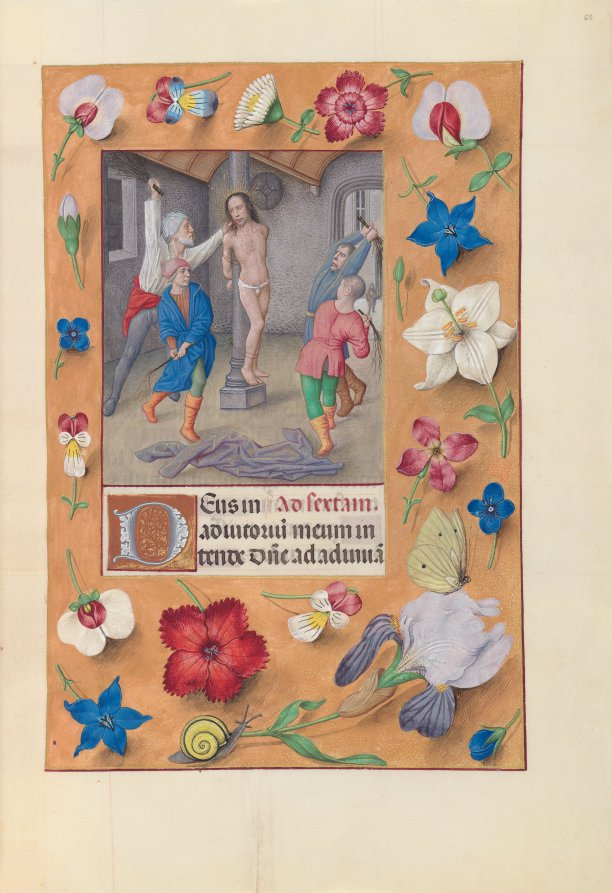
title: Hours of Queen Isabella the Catholic, Queen of Spain: Fol. 66r, Flagellation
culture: Flanders, Ghent and Bruges, late 15th century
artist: Master of the First Prayerbook of Maximillian (Flemish, c. 1444–1519)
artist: and Associates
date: c. 1500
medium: ink, tempera, and gold on vellum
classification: Bound Volume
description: This manuscript was illuminated by a circle of at least five highly organized manuscript painters active in the Flemish cities of Ghent and Bruges. The principal illuminator was Alexander Bening, who painted the majority of the book's miniatures. Manuscripts produced by this circle of artists are renowned for the decoration of their borders, which typically feature a rich variety of realistically-painted flowers, birds, and butterflies. This prayer book, called a book of hours, was intended not for a cleric, but for the private devotions of a lay person-in this case, Isabella the Catholic, Queen of Spain (1451-1504). Isabella's coat of arms embellishes the book's frontispiece. It is unlikely that the book was commissioned by the Queen herself; rather, she probably received it as a diplomatic gift from someone courting her patronage, perhaps Cardinal Francisco Jimenez de Cisneros. A Franciscan friar, Jimenez was dependent upon Isabella for his advancement, first to the post of Queen's confessor in 1492, and then to Archbishop of Toledo in 1495.